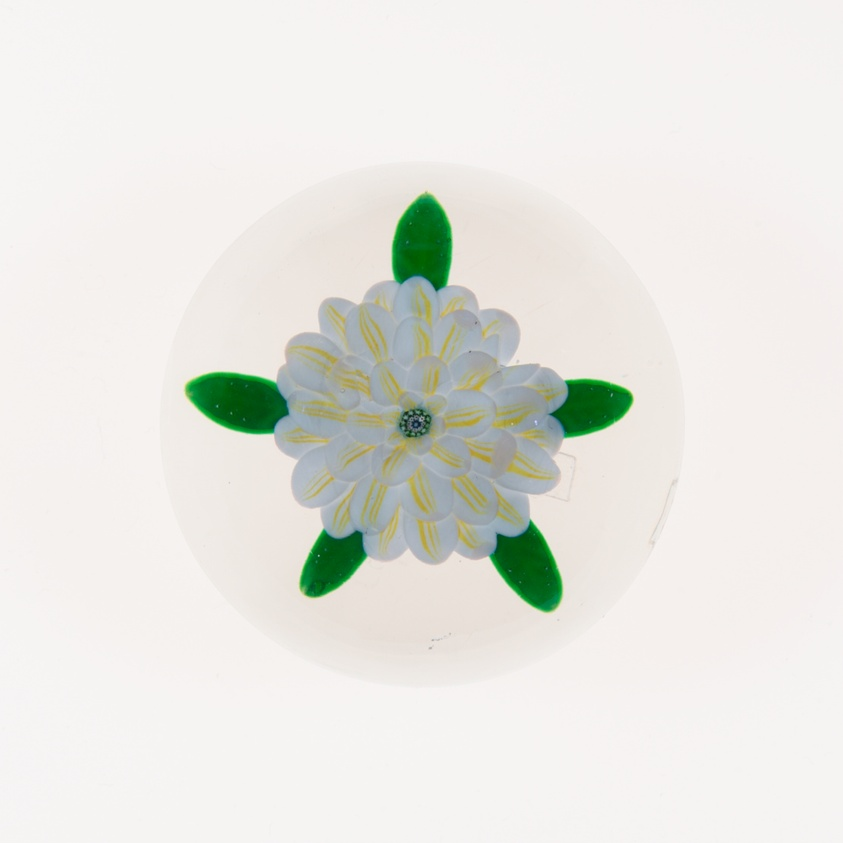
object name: Glass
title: Paperweight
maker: Clichy Glassworks (Cristalleries de Clichy); Clichy, France, 1837-1885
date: c. 1845/60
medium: Glass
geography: France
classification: paperweight; glass